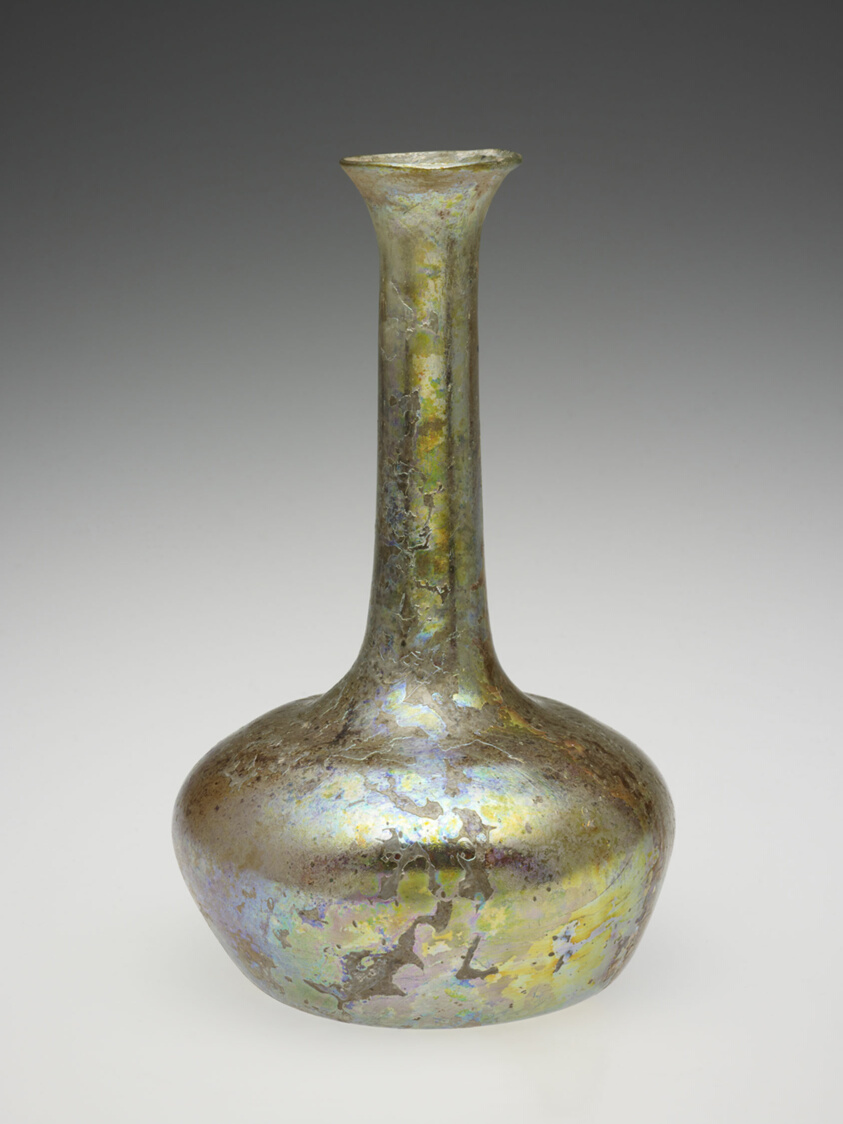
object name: Vessel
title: Bottle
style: roman (ancient, style or period), ancient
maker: Roman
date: 1st-2nd century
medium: Glass, blown technique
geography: Roman Empire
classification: bottle; glass; vessel; ancient art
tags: containers